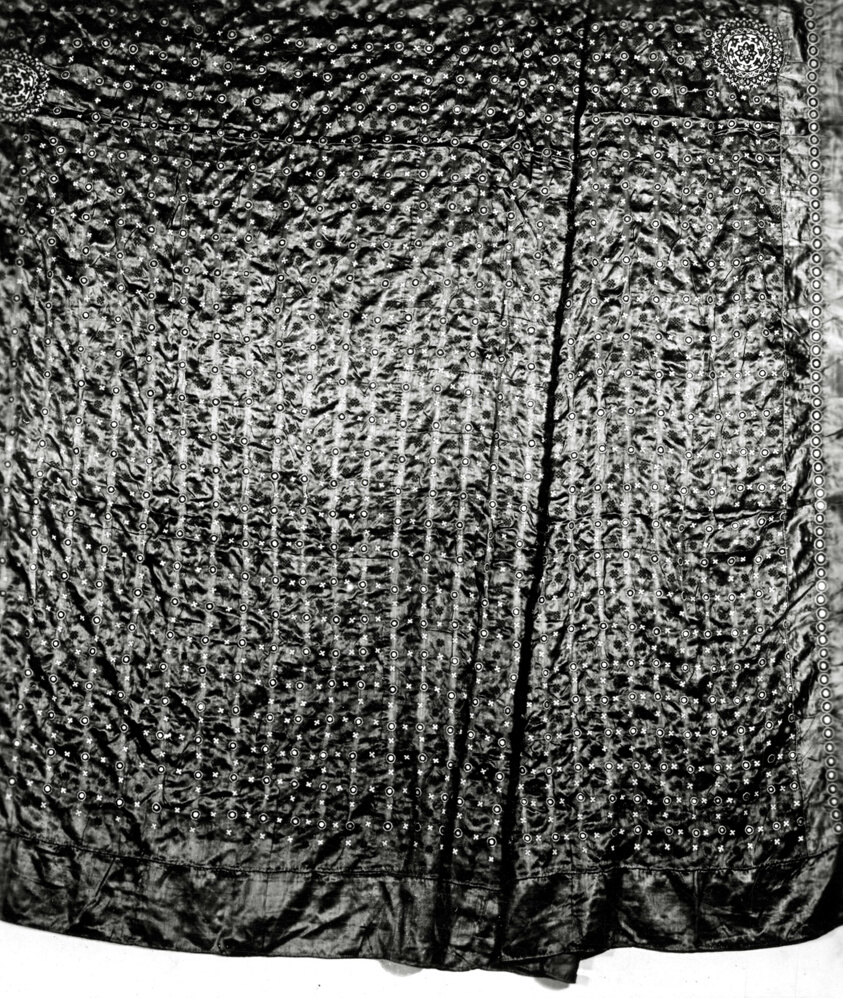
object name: Costume and Accessories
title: Shawl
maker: India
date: 19th century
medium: Silk; embroidered in eyelet, buttonhole and chain stitches and inset with tiny mirrors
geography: India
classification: textile; costume; dress (garment); clothing